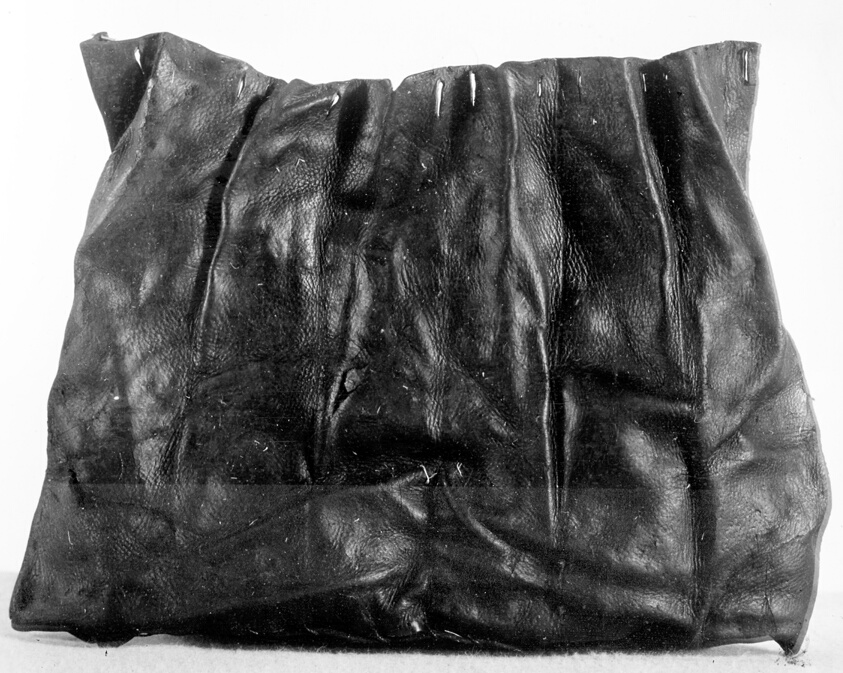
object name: Costume and Accessories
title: Bag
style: elizabethan, tudor, european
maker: England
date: 16th century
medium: Tooled leather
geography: England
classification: textile; costume accessory - bag; costume; dress (garment); clothing